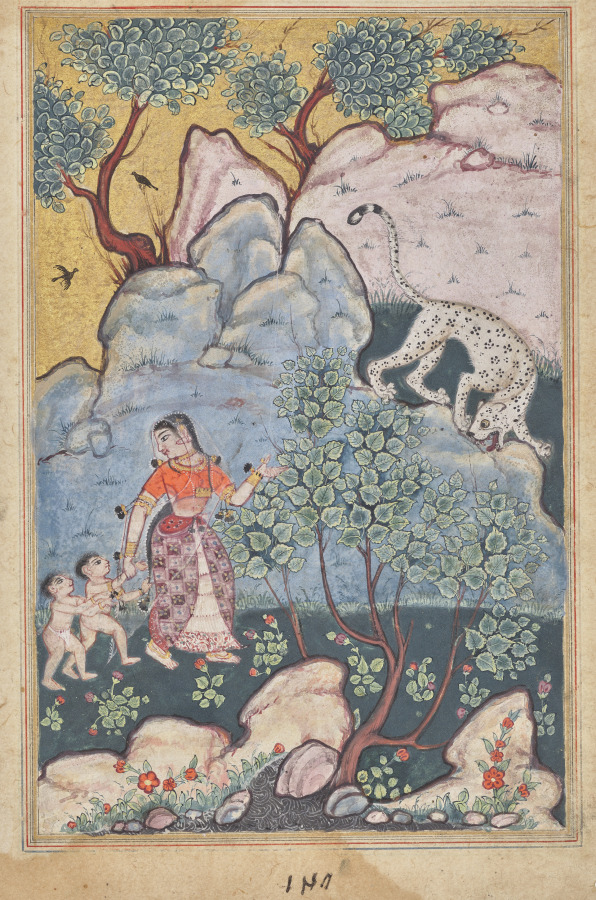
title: A woman with two children, having abandoned her home, goes into the forest where she encounters a leopard, from a Tuti-nama (Tales of a Parrot): Thirtieth Night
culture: Mughal India, court of Akbar (reigned 1556–1605)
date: c. 1560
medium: gum tempera, ink, and gold on paper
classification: Painting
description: A woman described as ill-tempered and quarrelsome was beaten by her husband, so she fled with her children into the wilderness. A fearsome leopard approached them, hoping to carry the children away for a meal. Thinking quickly, the woman offered the leopard one of her children and half of her own body, stating that a lion has staked claim to the other half. Fearing rivalry with the lion, the leopard quickly fled. The gold sky and arid landscape in shades of pink and blue derive from painting styles of northwestern Iran, but the woman’s dress is the tied blouse and wrapped skirt of India.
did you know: The woman is described as bad-tempered, quarrelsome, sharp-tongued, gossipy, and peevish.